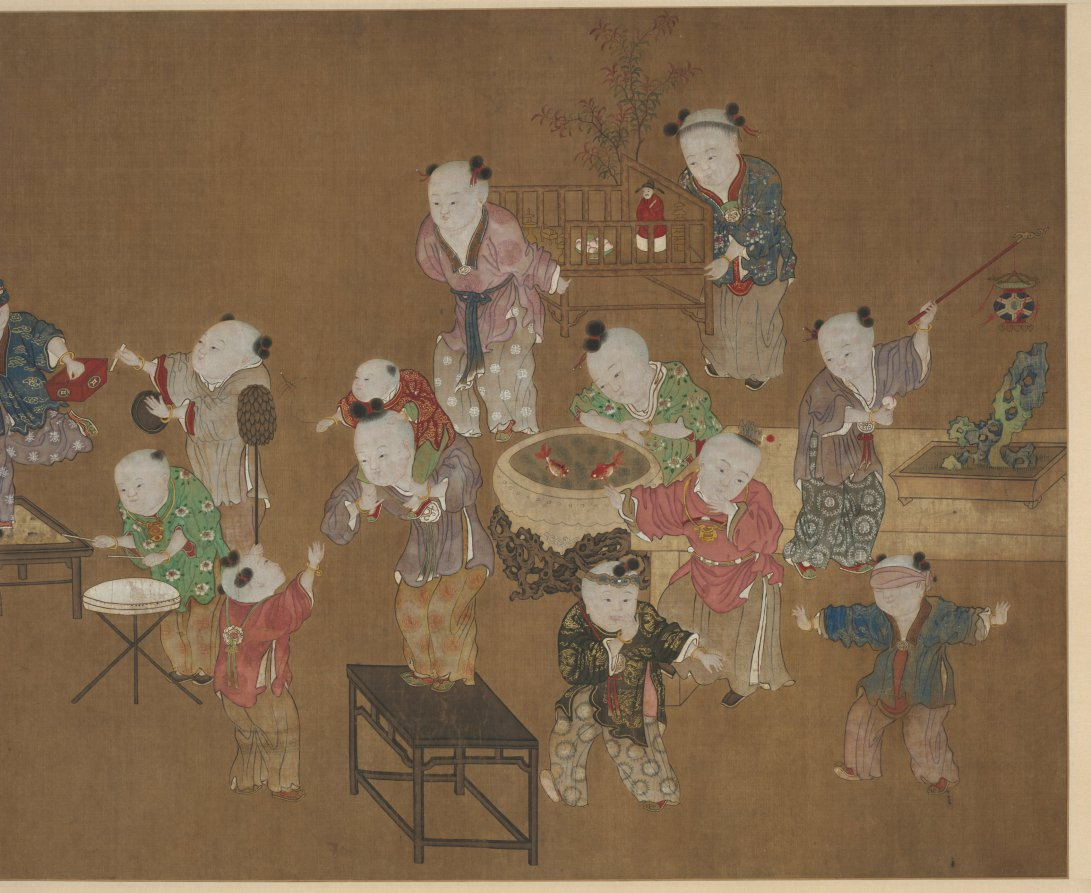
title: Children at Play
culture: China, Ming dynasty (1368–1644)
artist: Xia Kui (Chinese, active c. 1405–1445)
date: 1508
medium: hanging scroll; ink and color on silk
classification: Painting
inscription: 正德三年七月夏葵寫 [Zhengde san nian qi yue Xia Kui xie]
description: Sixteen children engage in scholarly, religious, and military activities, representing the popular “one hundred boys” theme expressing the wish for abundant, successful male offspring. Such paintings conveying auspicious wishes were often displayed during the New Year festival season. Two older boys wear small crowns with red tassels. Another child with a mask holds a brush in one hand, a rice measure in the other. He stands on a low table imitating Kuixing, the God of Examinations and servant to the God of Literature.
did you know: In the foreground on the right are three boys playing a kind of blind man’s bluff.